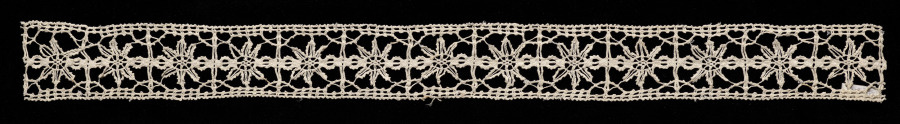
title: Lace Insertion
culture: Italy, Venice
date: 1580–99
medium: Bobbin lace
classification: Lace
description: This piece of bobbin lace is based on a needle lace (reticella) design.